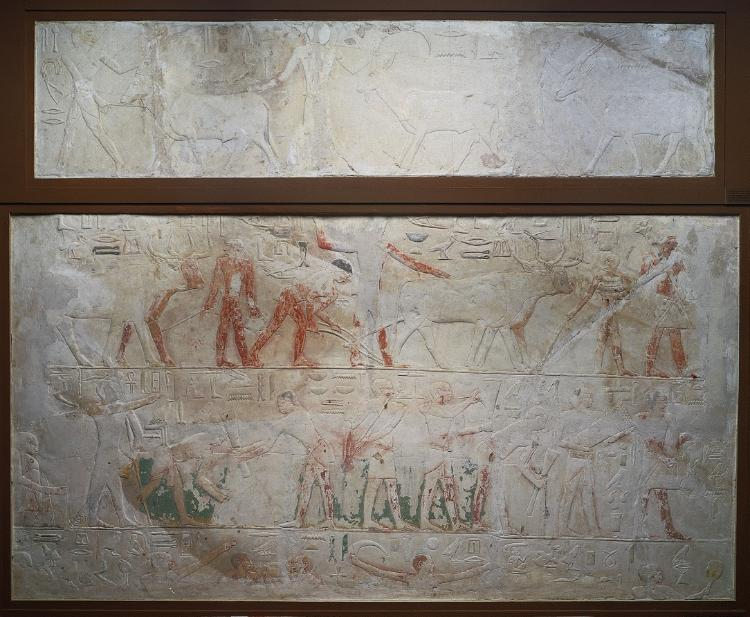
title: Relief of Agricultural Scenes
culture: Egypt, Saqqara, Old Kingdom (2647–2124 BCE), Dynasty 6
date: c. 2311–2281 BCE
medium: painted limestone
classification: Sculpture